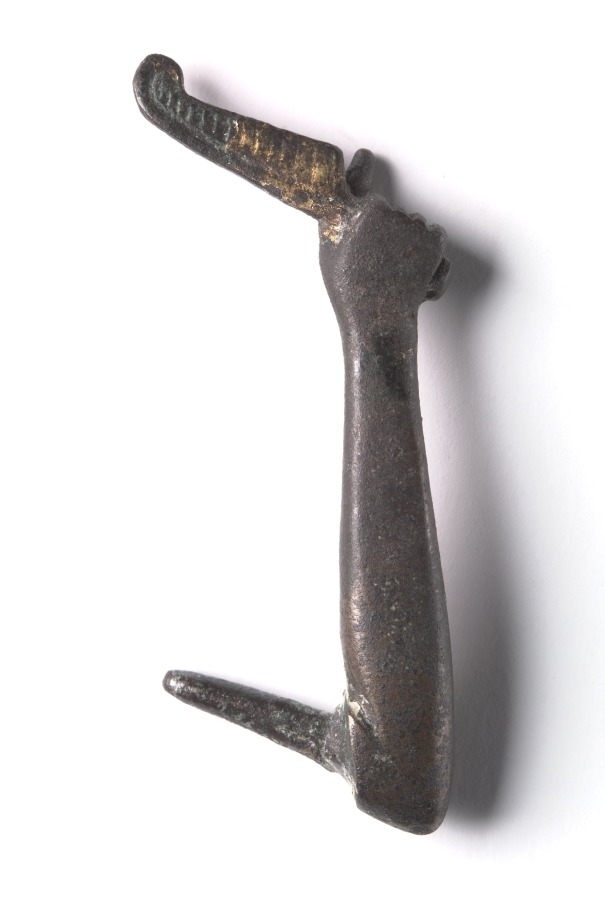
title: Bronze Mount from a "Shawabty Bundle": Arm with Feather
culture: Egypt, Thebes, Wadi Qubbanet el-Qirud, New Kingdom (1540–1069 BCE), Dynasties 18–19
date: c. 1336–1256 BCE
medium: bronze with traces of gilding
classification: Funerary Equipment